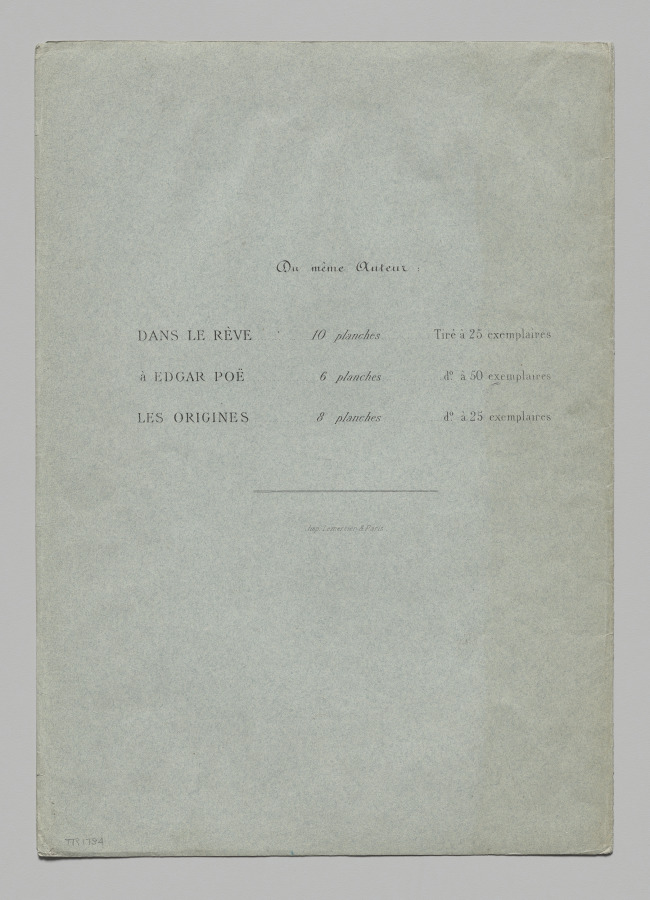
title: Cover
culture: France, 19th century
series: Homage to Goya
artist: Odilon Redon (French, 1840–1916)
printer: Lemercier & Cie.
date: 1885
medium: lithograph on China paper laid on wove paper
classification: Print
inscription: printed above image at center: Planche I.; below image at center: Dans mon rêve, je vis au Ciel un VISAGE DE MYSTÈRE.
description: This series is one of many that Odilon Redon created throughout his career. Nearly two-thirds of his lithographs took the form of portfolios—prints connected conceptually by a theme or narrative and physically by a folder or binding. Such works were often dispersed over time, but Cleveland was fortunate to acquire several complete sets with their original covers during the 1920s. Dating from Redon’s early experimentation with lithography, Homage to Goya was intended as a tribute to 18th-century Spanish master Francisco de Goya, whose interest in dreams and the subconscious influenced Redon. The six seemingly unrelated images celebrate Goya’s ambiguity and collectively suggest the introspection and isolation of artistic practice.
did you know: This portfolio was published in an edition of 50, one of which Redon sent to poet Stéphane Mallarmé soon after Redon became a frequent participant in a literary salon held regularly at Mallarmé's home.